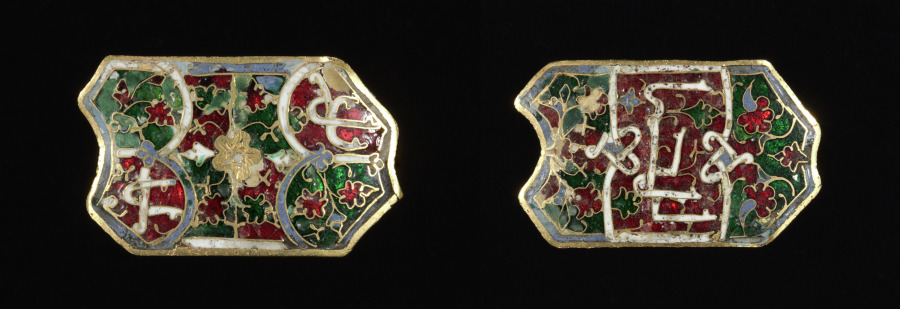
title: Pair of Plaques (Appliqué)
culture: Spain (Hispano-Moresque), 14th century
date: 1300s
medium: translucent enamel on gold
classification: Enamel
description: This oblong plaque is decorated with pseudo-Kufic (fake Arabic) designs indicating that it was produced in Spain under Muslim influence. It may have served as an applied ornament to some article of personal adornment such as a belt. It is possible that the design was inspired by Arabic coinage.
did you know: Enamel can be made opaque or translucent; when translucent, it resembles stained glass, allowing light to pass through.